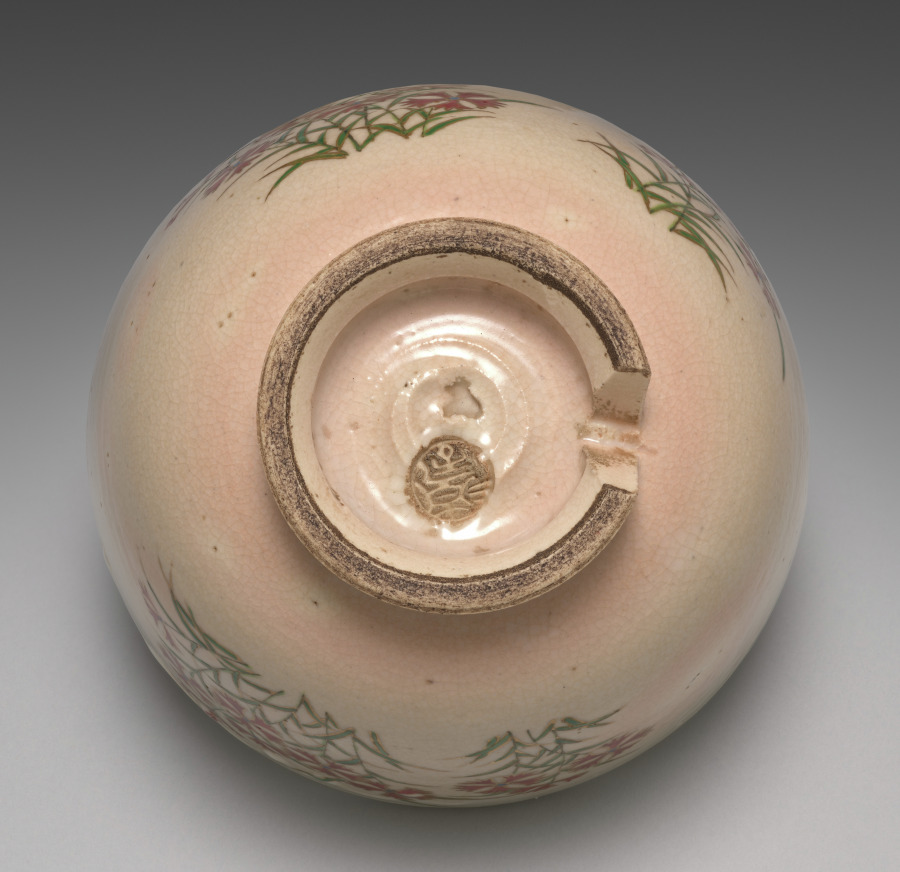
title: Teabowl with Pinks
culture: Japan, Meiji period (1868–1912)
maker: Seifū Yohei III (Japanese, 1851–1914)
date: 1893–1914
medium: Stoneware with crackled glaze and overglaze color enamel and gold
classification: Ceramic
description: This teabowl, for use in chanoyu, is a good example of Yohei III’s mastery of the techniques involved in producing Kyoto ware. The painting of the pinks, with their blue centers, bright red petals, and green leaves, is carefully controlled with crisp gold borders throughout. There is crackling in the transparent glaze and obvious, thick dripping of the milky glaze over the outside of the mouth of the bowl. The pink spots would have appeared in the clay during firing, and the bottom of the inside of the bowl is entirely pink. A triangular wedge has been cut away from the foot, and a gently impressed band rings the bowl beneath the rim.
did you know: The vessel comes with a bespoke brocade pouch with a silk fastening cord, as is customary for Japanese teabowls.